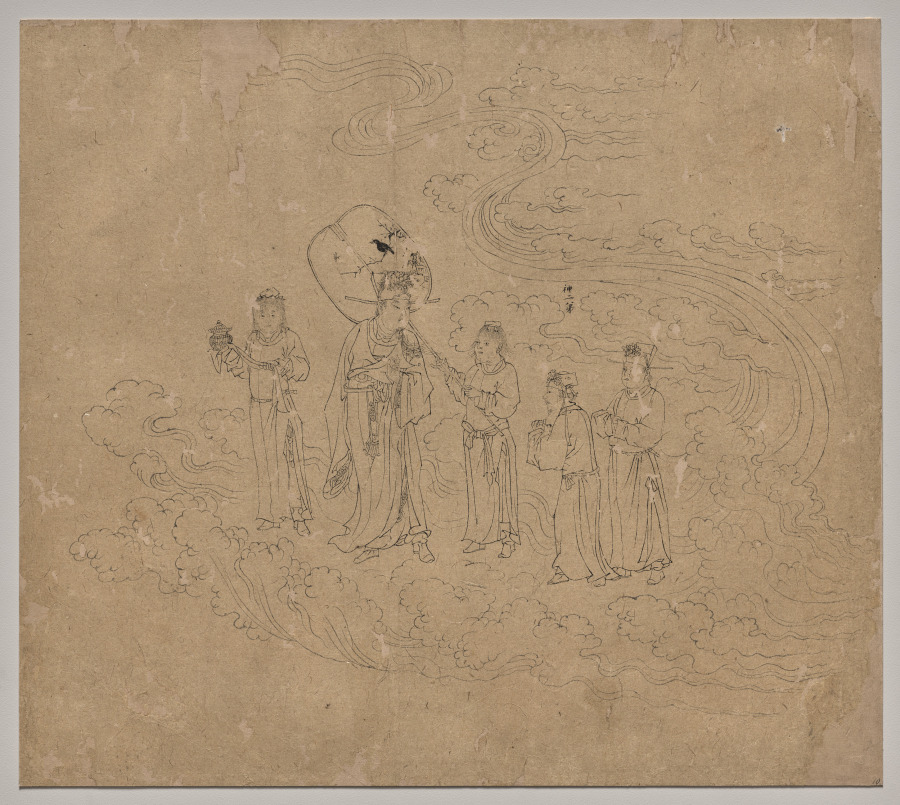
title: Album of Daoist and Buddhist Themes: Procession of Daoist Deities: Leaf 10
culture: China, Southern Song dynasty (1127-1279)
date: 1200s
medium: Album, ink on paper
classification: Painting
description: This extraordinary album has 50 paintings on a variety of religious subjects. They were likely created by several master craftsmen to share with studio apprentices as models for fulfilling commissions. The Jade Emperor and the Daoist pantheon make up the first 26 leaves. The next 14 leaves portray the Buddhist Ten Kings of Hell administering punishments to the dead. The third section, called “Clearing the Mountains,” features divine soldiers, led presumably by the deity Erlang Shen 二郎神, fighting undesirable creatures.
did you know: One of the divine lord's attendants is identified as "the second brother of the deity" 神二弟.